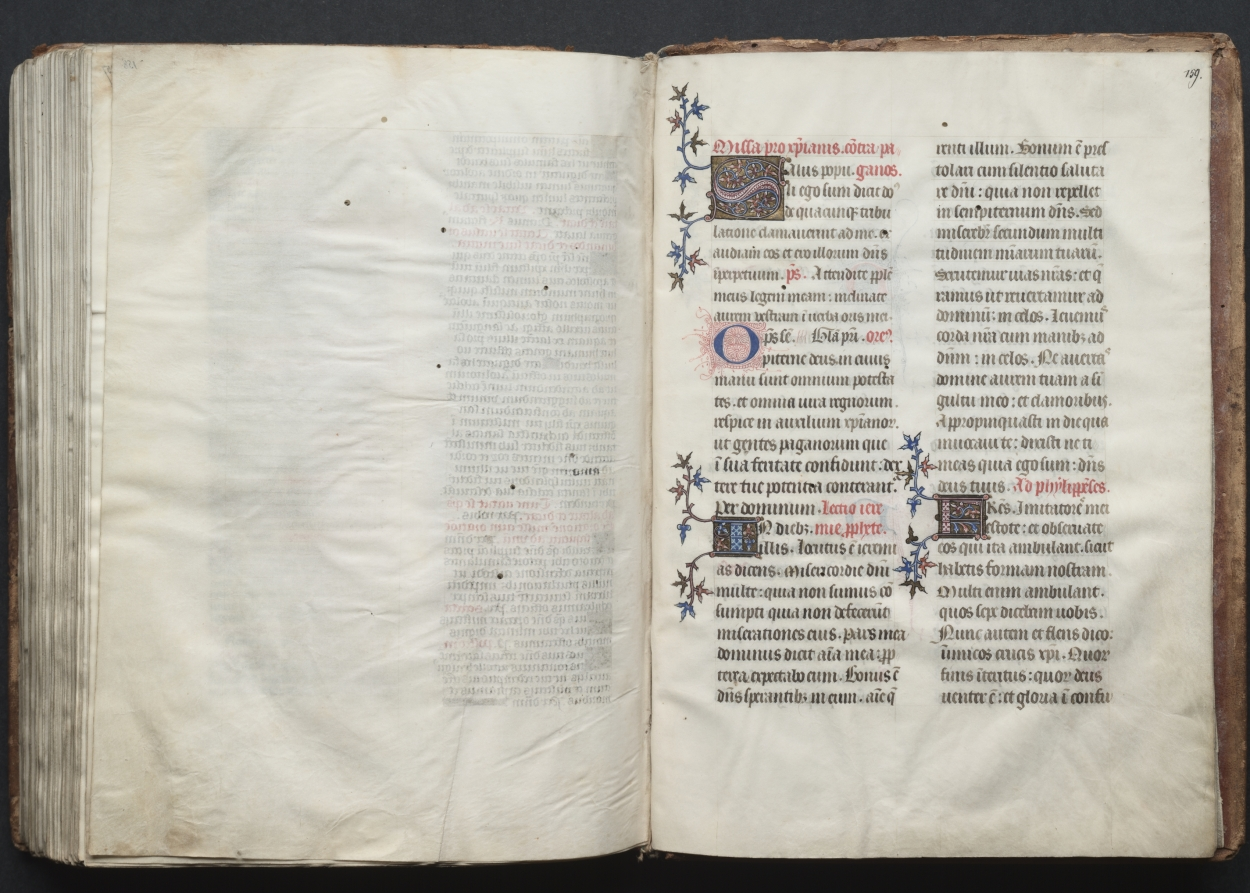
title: The Gotha Missal: Fol. 159r, Text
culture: France, Paris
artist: Master of the Boqueteaux (French)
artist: and Workshop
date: c. 1375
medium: ink, tempera, and gold on vellum; blind-tooled leather binding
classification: Bound Volume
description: The style and quality of this manuscript's decoration is typical of deluxe Parisian books made for aristocratic or royal patrons. Most of the book's decoration appears to be the work of the Master of the Boqueteaux, an artist active at the court of King Charles V (died 1380). His style was apparently shared by a number of book illuminators working in and around Paris. It is very possible that the Gotha Missal belonged to Charles V, but is not provable because the manuscript has no royal portraits and lacks a colophon. Given the book's magnificent decoration, however, it would seem that it was produced for a Valois prince, if not for the king himself. The manuscript receives its name from the German dukes of Gotha, its later owners.